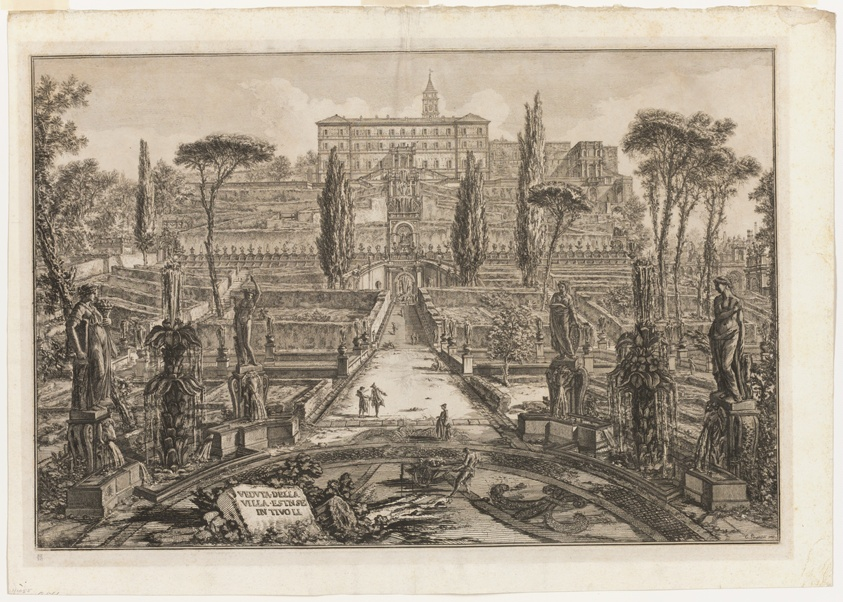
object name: Print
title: View of the Villa d'Este, Tivoli, from Views of Rome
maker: Giovanni Battista Piranesi (Italian, 1720-1778); published by Francesco (Italian, 1758-1810) and Pietro Piranesi (Italian, born 1758/9)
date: 1773, published 1800–07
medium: Etching on heavy ivory laid paper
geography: Italy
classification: etching; print; prints and drawing